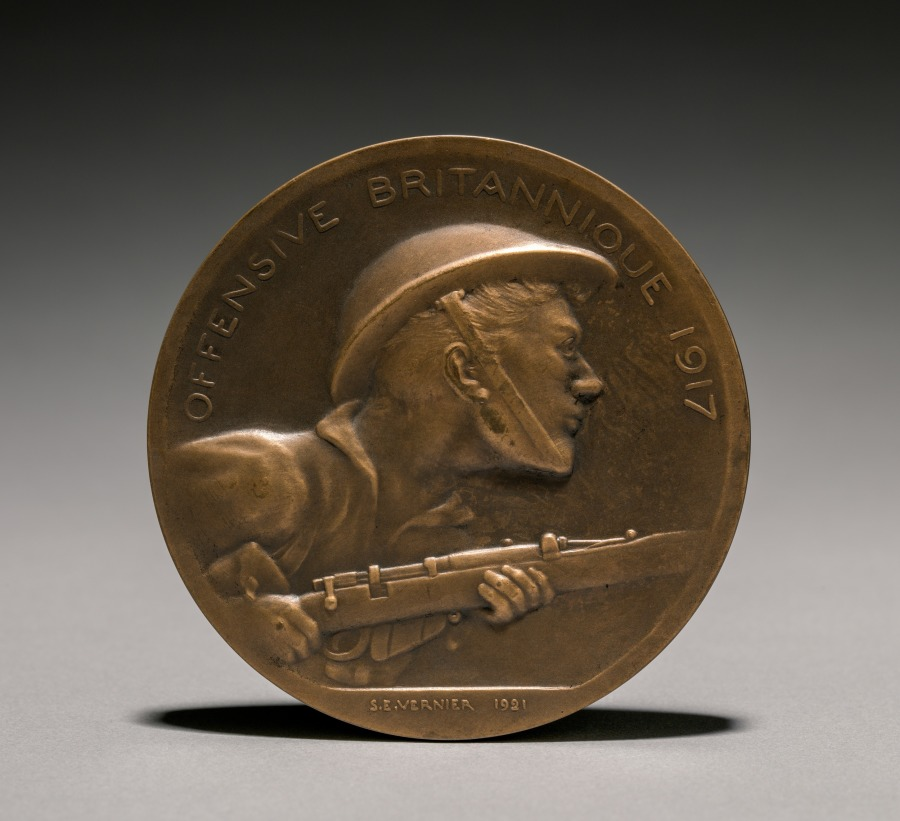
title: Medal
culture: France, early 20th century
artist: Èmile Séraphin Vernier (French, 1852–1927)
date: 1921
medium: bronze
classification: Metalwork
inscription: obverse - "Offensive Brittanique 1917"; signed: "S. E. Vernier, 1921." reverse - "Vimy, Arras, Ypres, Marechal Sir Douglas Haig, Generaux Sir Henry Horne, Sir Herbert Plumer, Sir Julian Byng, Sir Hubert Gough."